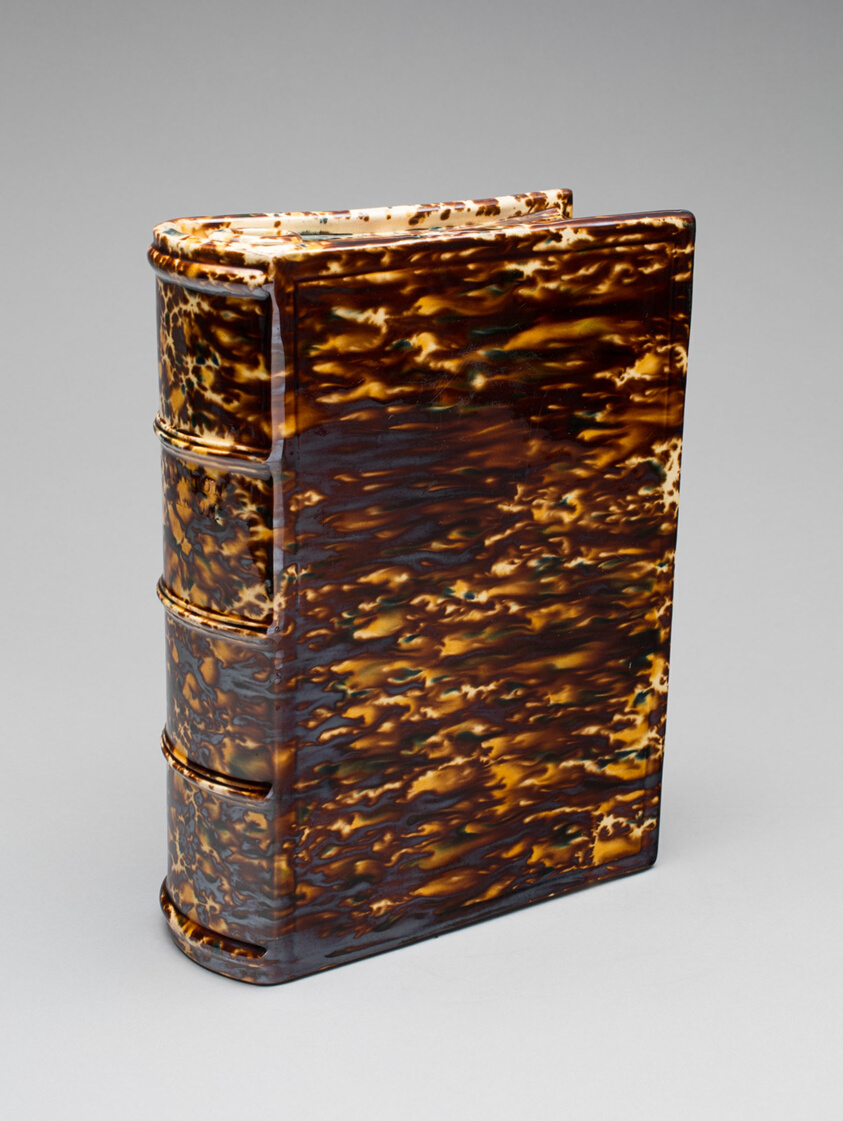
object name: Decorative Arts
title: Flask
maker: Lyman, Fenton & Company; American, 1849–52; Bennington, Vermont, or; United States Pottery Company; American, 1847–58; Bennington, Vermont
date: 1840–60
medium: Earthenware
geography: Bennington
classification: vessel; bottle; american decorative arts; american arts; ceramics; decorative arts